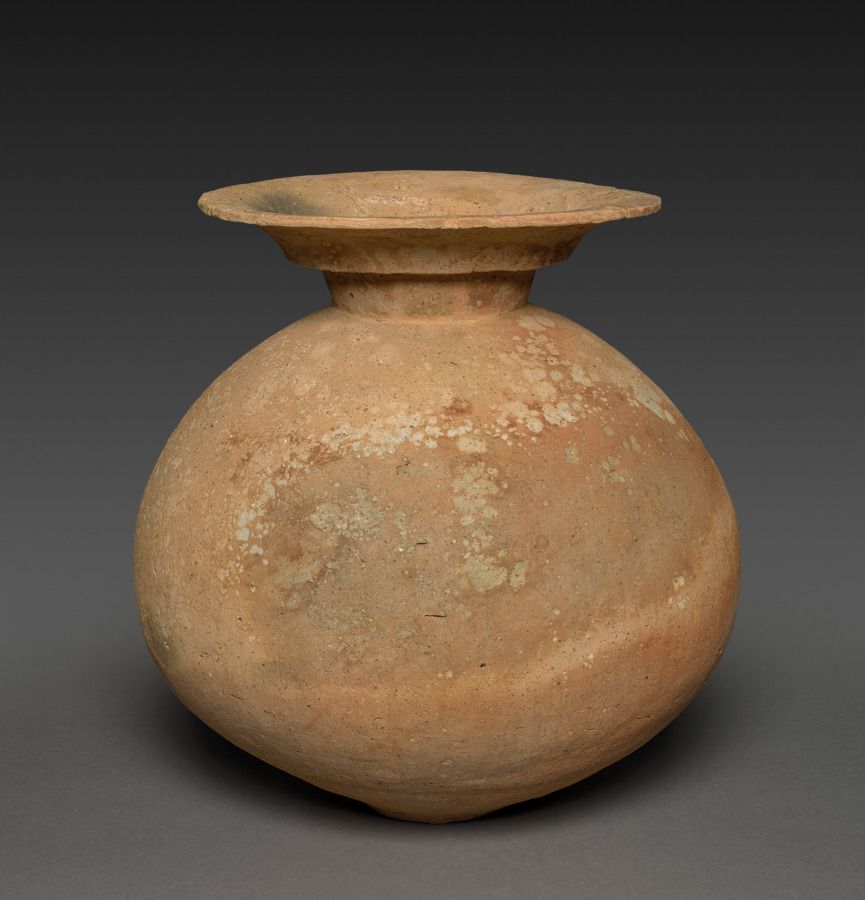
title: Vessel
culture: Japan, Yayoi period (c. 300 BCE–300 CE)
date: 300s BCE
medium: Earthenware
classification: Ceramic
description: Pottery existed for thousands of years in Japan before the Yayoi period, but the development of wet rice agriculture and permanent settlements by previously nomadic communities changed its form significantly. Yayoi period pots were aimed more at long-term storage than those from prior millennia. Their smooth, unadorned surfaces and round shapes also reflect the style of contemporaneous works from the Korean peninsula, indicating the strong ties between Japanese communities and Korean kingdoms at the time.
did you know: Yayoi ceramics, like this example, were likely made by laying one coil of clay on top of another to form the body of the vessel.